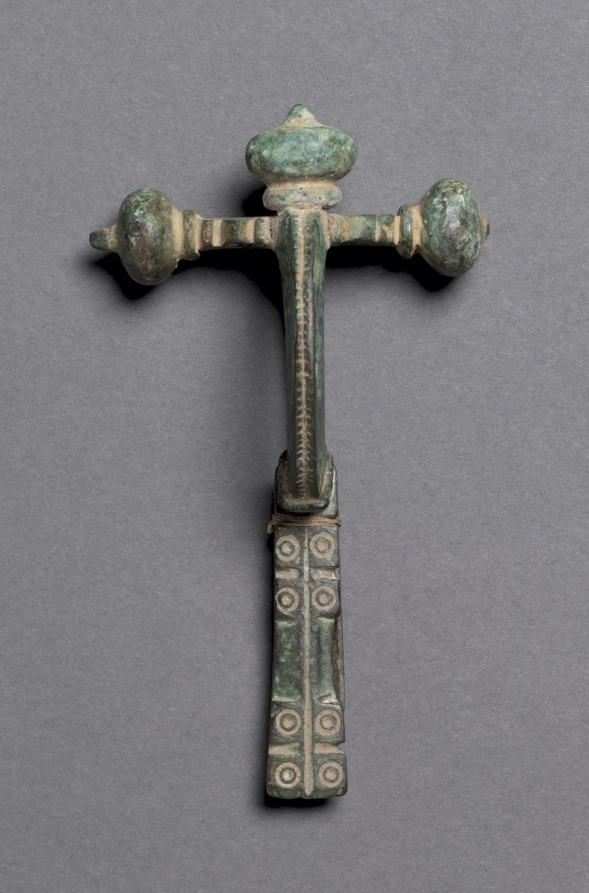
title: Cross-bow Fibula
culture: Italy, Roman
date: c. 1–200 CE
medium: bronze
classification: Jewelry